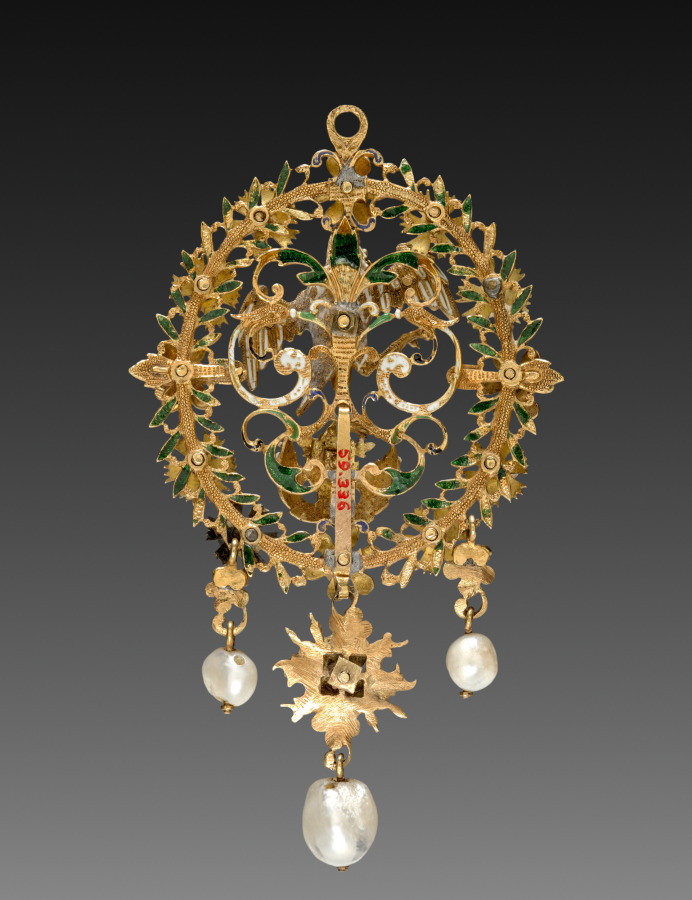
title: Pendant with Pelican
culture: Germany, early 17th century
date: c. 1600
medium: enameled gold with rubies, emeralds, diamonds, and pearls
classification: Jewelry